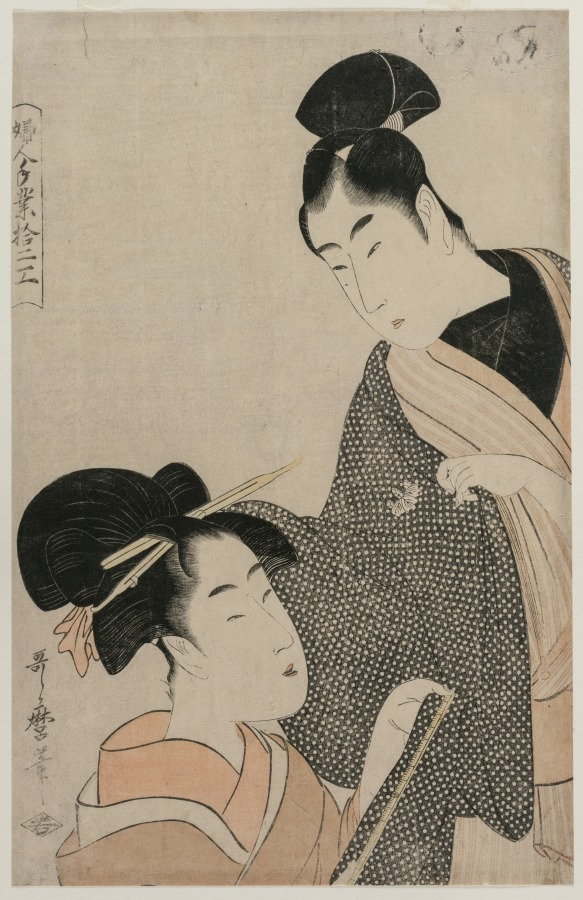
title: Woman Measuring a Man's Gown (from the series Twelve Occupations of Women)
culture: Japan, Edo period (1615–1868)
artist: Kitagawa Utamaro (Japanese, c. 1754–1806)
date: late 1790s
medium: color woodblock print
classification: Print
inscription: Signature: Utamaro hitsu.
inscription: Publisher: Wakasaya Yoichi (Waka).